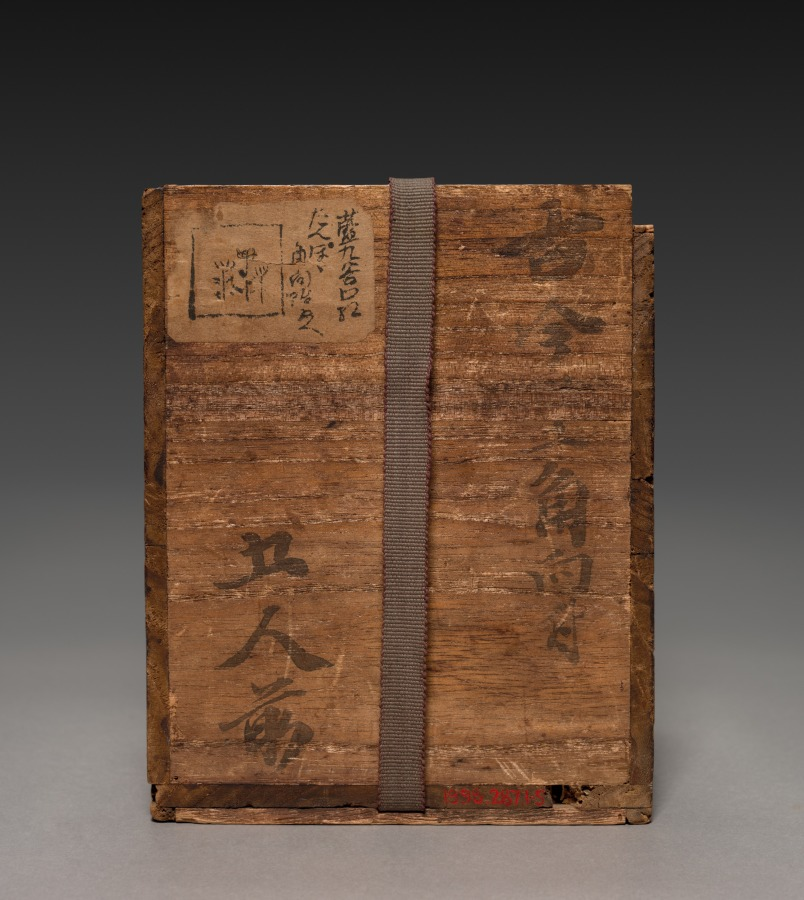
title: Side-Dishes with Dandelion in Rocks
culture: Japan, Edo period (1615–1868)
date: 1700s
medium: Set of five dishes; porcelain with underglaze blue and overglaze iron oxide (Arita ware, Kutani style)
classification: Ceramic